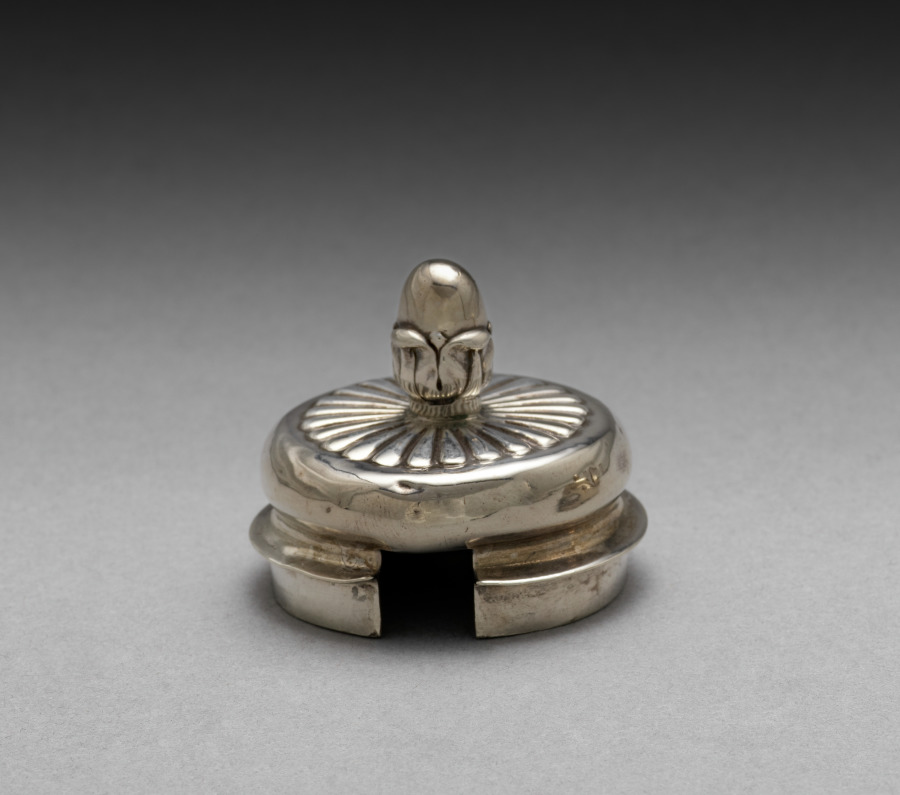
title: Pot (cover) (1 of 2)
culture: England, 19th century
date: 1817–18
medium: silver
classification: Silver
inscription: Stamped on lid: "PS, Lion Passant, "b".